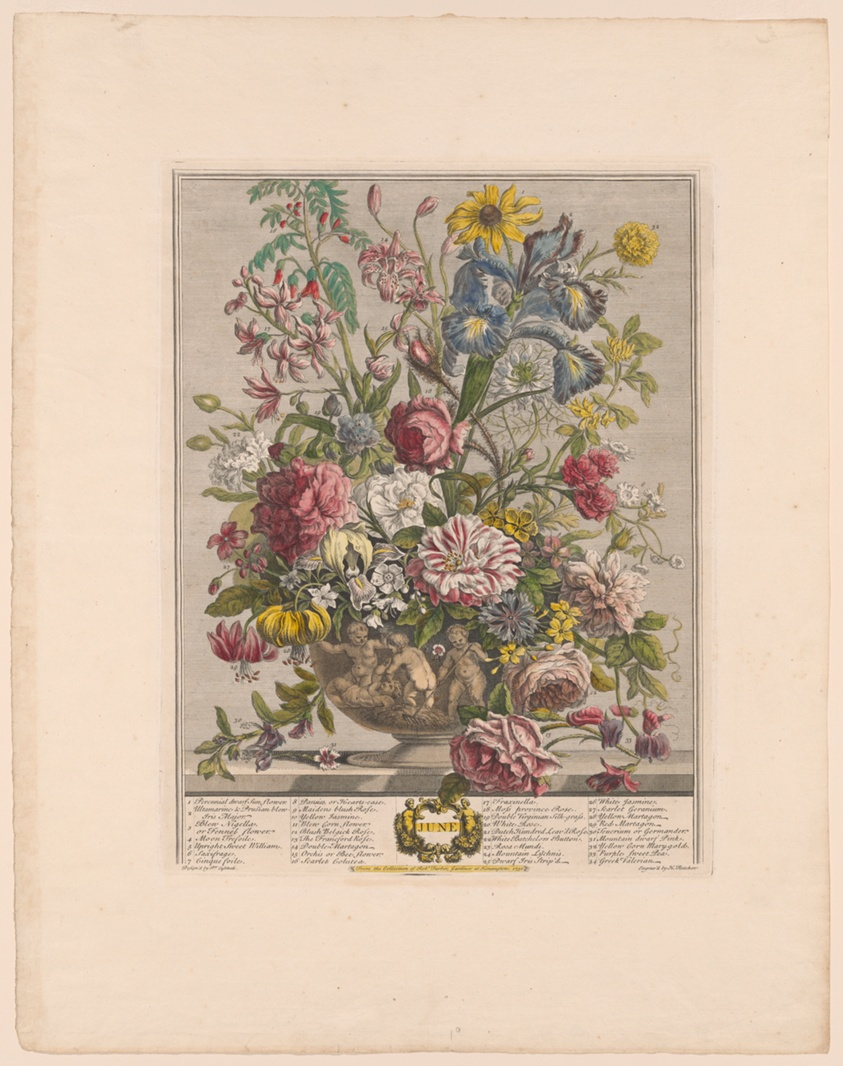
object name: Print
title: June, from Twelve Months of Flowers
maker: Henry Fletcher (English, 1710-1750); after Peter Casteels III (Flemish, 1684-1749)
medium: Engraving in black ink with opaque and translucent watercolor on cream laid paper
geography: England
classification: etching; print; prints and drawing